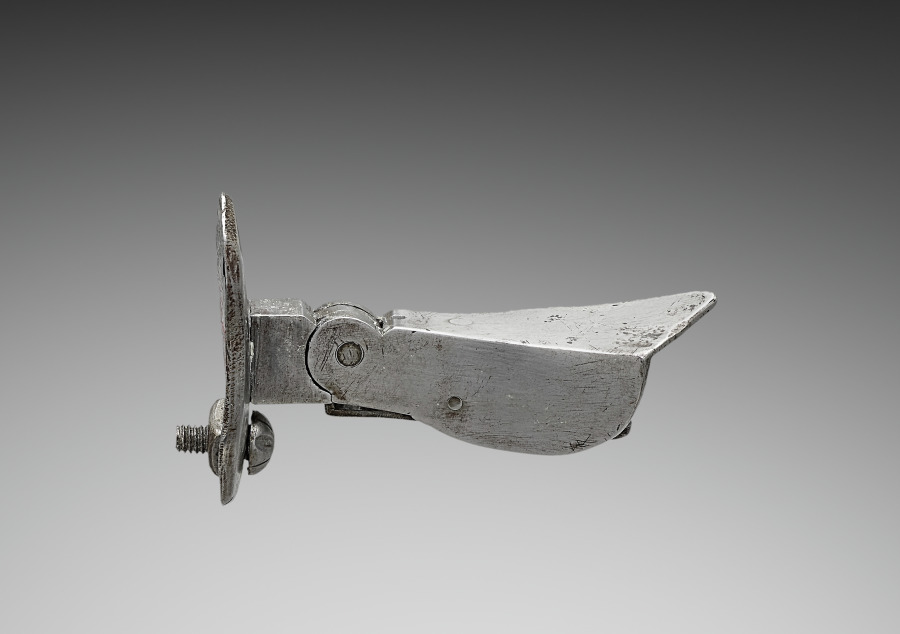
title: Lance Rest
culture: Germany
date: c.1550–1570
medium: iron, steel, leather and brass rivets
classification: Arms and Armor